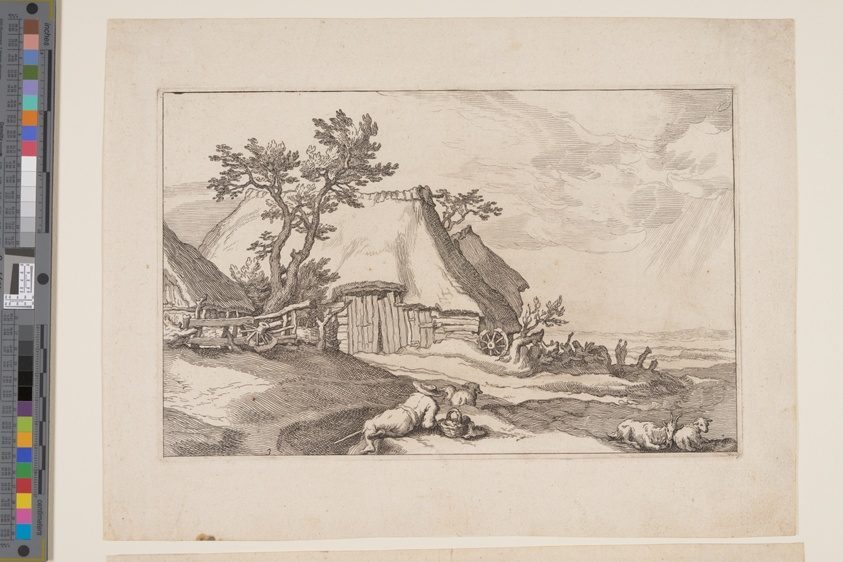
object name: Print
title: Plate 3, from Landscapes with Farmhouses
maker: Boëtius Adamsz. Bolswert (Flemish, 1580–1633); after Abraham Bloemaert (Dutch, 1566–1651)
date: 1614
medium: Etching on ivory laid paper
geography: Flanders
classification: print; paper; prints and drawing; etching